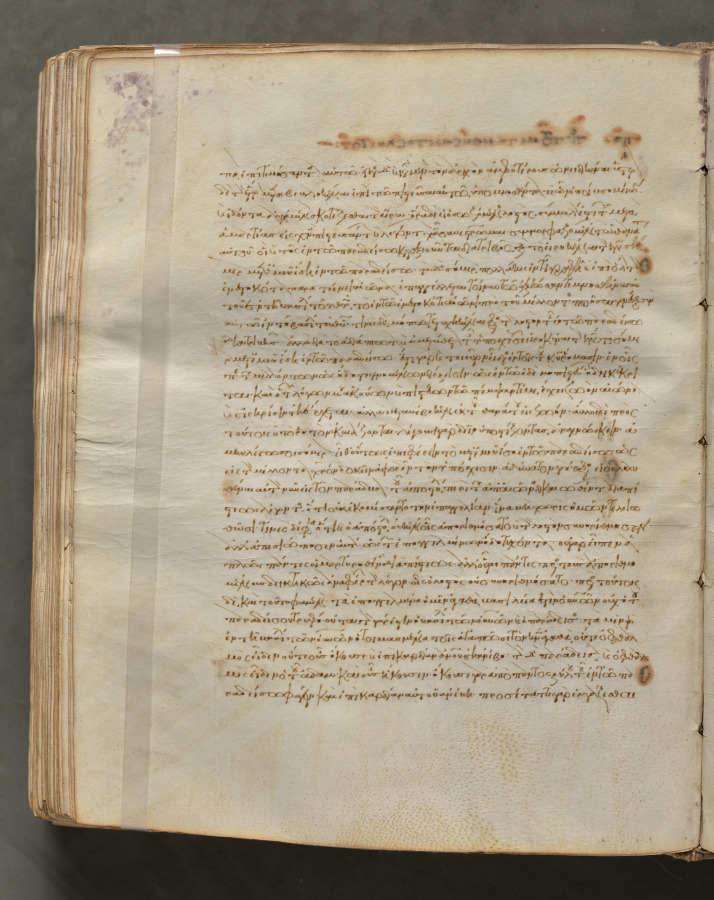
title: Text, folio 316 (verso), from a Gospel Book with Commentaries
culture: Byzantium, Constantinople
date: c. 1000–1100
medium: ink, tempera, and gold on vellum; leather binding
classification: Bound Volume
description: Each of the four gospels in this book opens on a page with brilliantly illuminated borders depicting the author of the text as well as birds—principally peacocks, symbols of the immortality of the soul—and fountains, representing the fountain of life and the salvation of the soul. This volume consists of 428 leaves with texts in Greek. Its level of sophistication suggests that it was probably written and decorated in a monastery in Constantinople.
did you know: Gospel books were carried in procession through Byzantine churches.